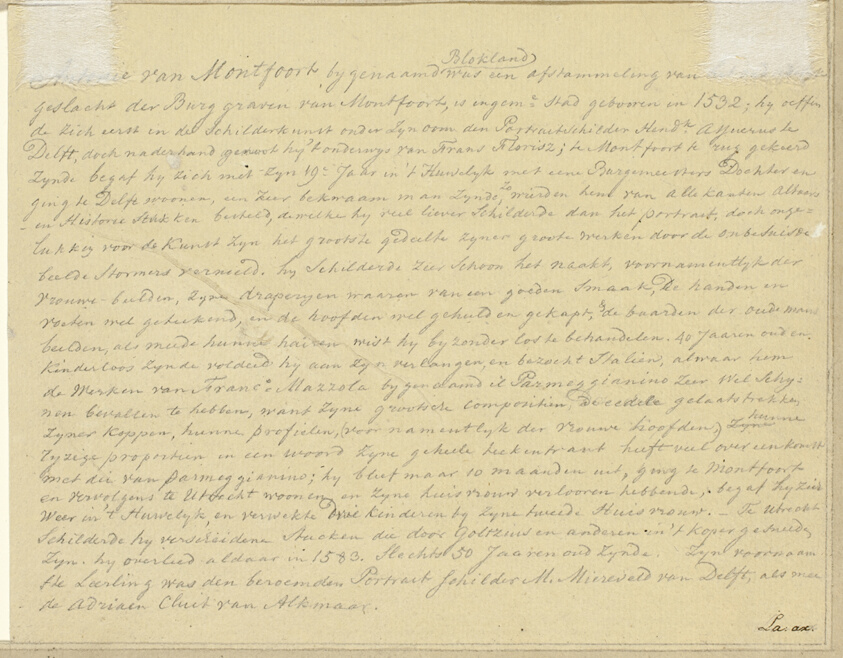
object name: Drawing and Watercolor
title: Cecrops' Daughters Uncover Erichthonius (recto); A Battle Scene (verso)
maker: Anthonie van Montfoort Blocklandt (Netherlandish, 1532-1583)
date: 1577/78 (recto); n.d. (verso)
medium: Pen and brown ink with brush and brown wash (recto and verso), on ivory laid paper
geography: Netherlands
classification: ink or chalk wash; drawings (visual works); prints and drawing